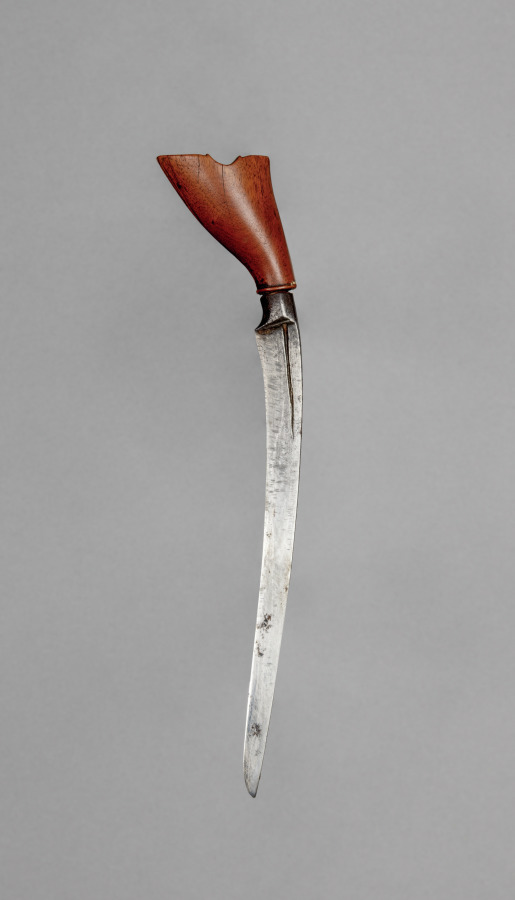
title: Knife (Kris)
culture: Indonesia or Malaysia, Early 20th century (?)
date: c 1900– 1925 ?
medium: metal, wood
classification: Arms and Armor